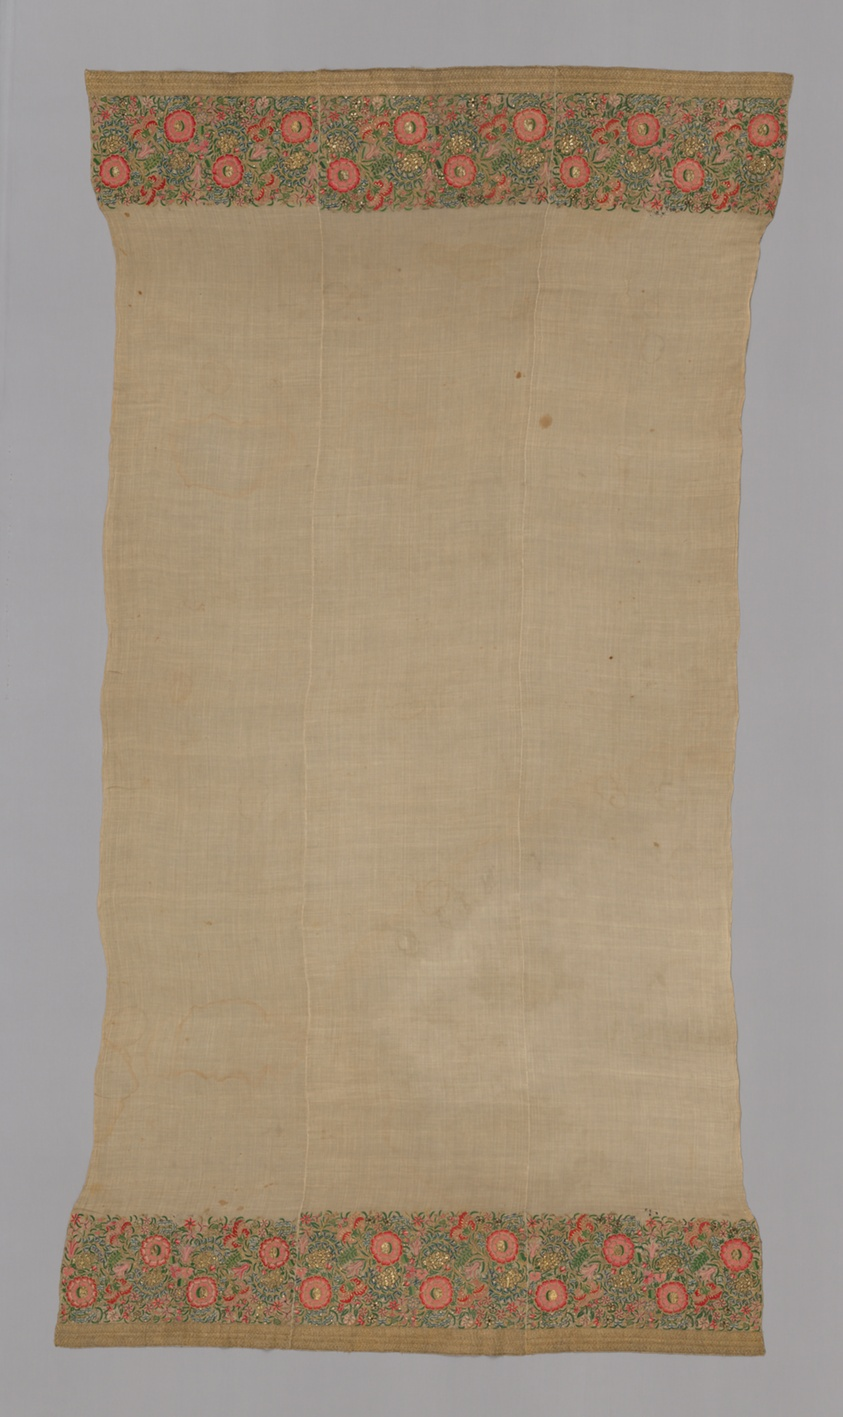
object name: Textile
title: Cover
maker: Turkey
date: 19th century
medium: embroidered ends in a rose spray pattern, edged with a wide band of gold thread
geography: Turkey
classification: textile; needlework (visual works); weaving